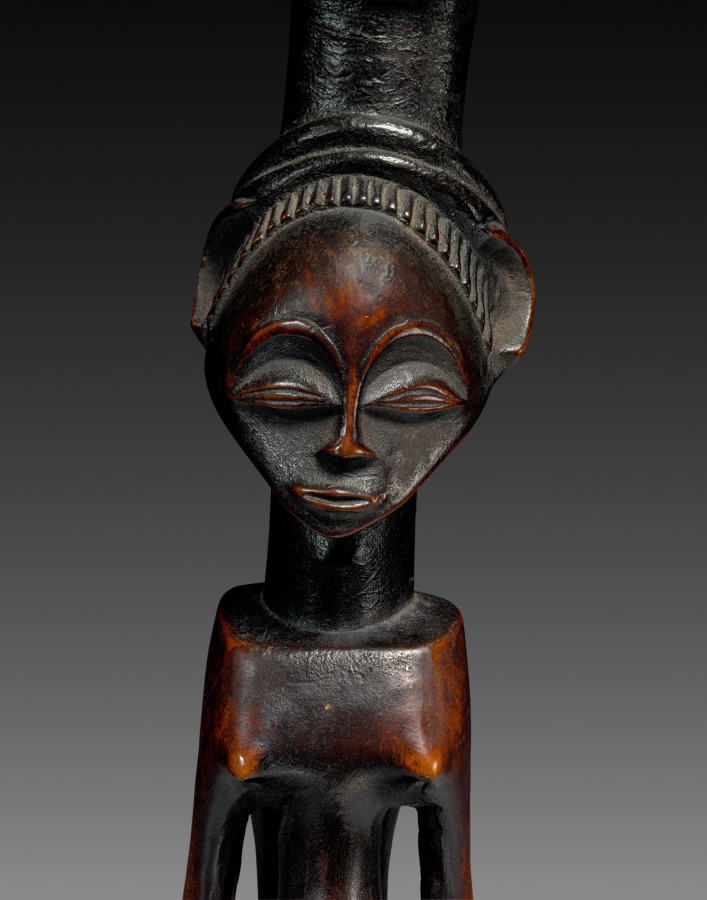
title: Bow Stand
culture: Africa, Central Africa, Democratic Republic of Congo, Luba-style carver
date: 1800s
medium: Wood and plant fiber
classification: Sculpture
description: A powerful symbol of the Luba king, bow stands were ceremonial objects that resided within the king’s private vicinity in the palace and were never displayed in public. Typically, bow stands depict a female figure, but the sculptor has carved a figure with ambiguously gendered human traits. This is a symbolic depiction that may allude to how divine rulers (mulopwe) were believed to have both “male” and “female” character traits, which allowed this sculpture to act as a vessel for spirits of any gender.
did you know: The shape of this wooden bow stand is based on a more practical version in metal used by hunters.